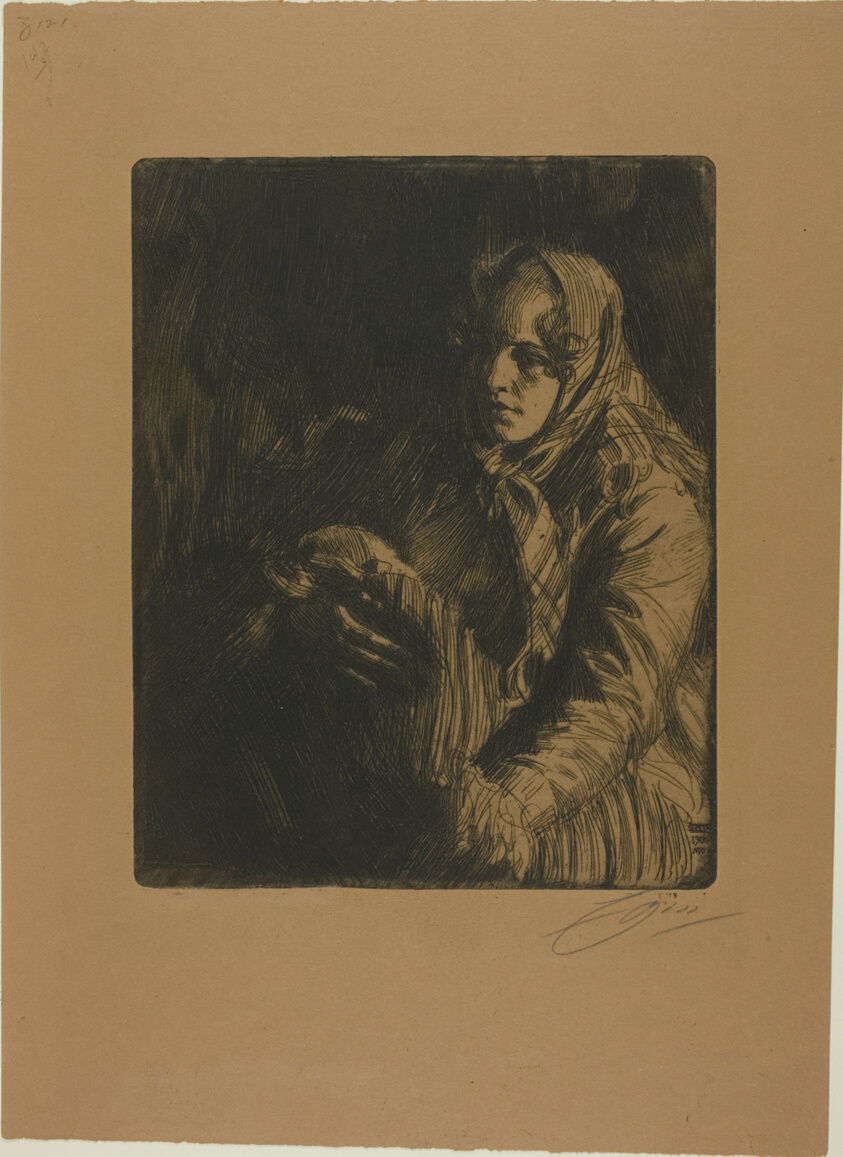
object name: Print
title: Madonna (A Mother)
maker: Anders Zorn (Swedish, 1860-1920)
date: 1900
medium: Etching on brown wove paper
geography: Sweden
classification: etching; print; prints and drawing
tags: mothers, children, babies